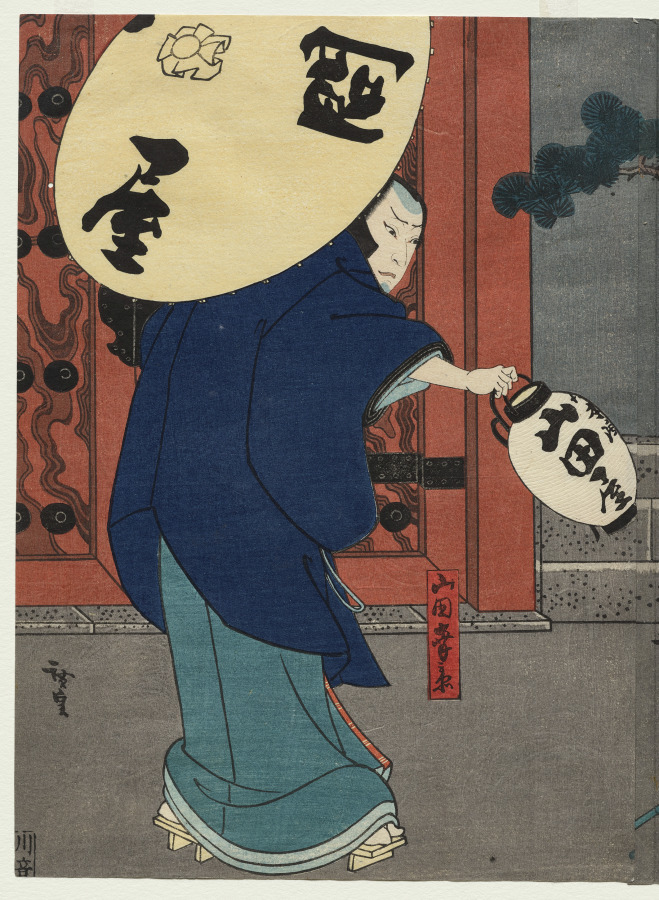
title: Nakamura Utaemon IV as Karaki Masaemon (From the series A Tale of Valor at Iga Pass)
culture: Japan, Edo period (1615–1868)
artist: Gosōtei Hirosada (Japanese)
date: c. 1850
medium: color woodblock print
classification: Print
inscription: Signature: Hirosada